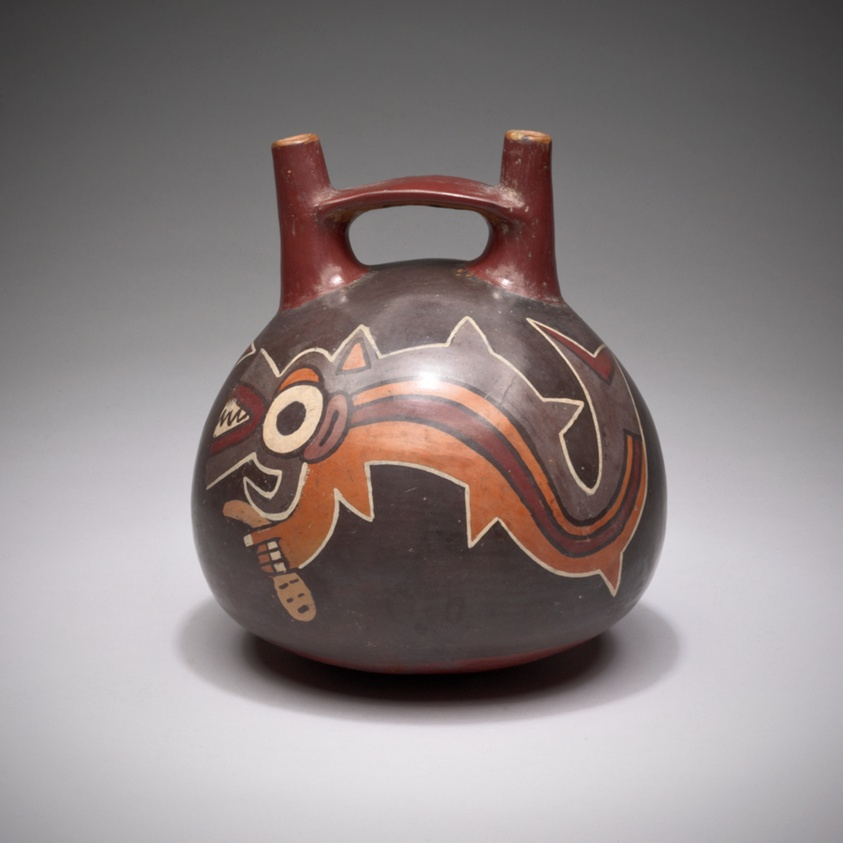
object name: Vessel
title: Vessel with Killer Whales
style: nazca, early intermediate period, Pre-Columbian, americas, andes, Arts of the Americas, andean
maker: Nazca; South coast, Peru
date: 100 BCE–500 CE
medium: Ceramic and pigment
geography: Peruvian South Coast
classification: earthenware; art of the americas; ceramics; vessel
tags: whale, animals, sacrifice, anthropomorphic figure, fish